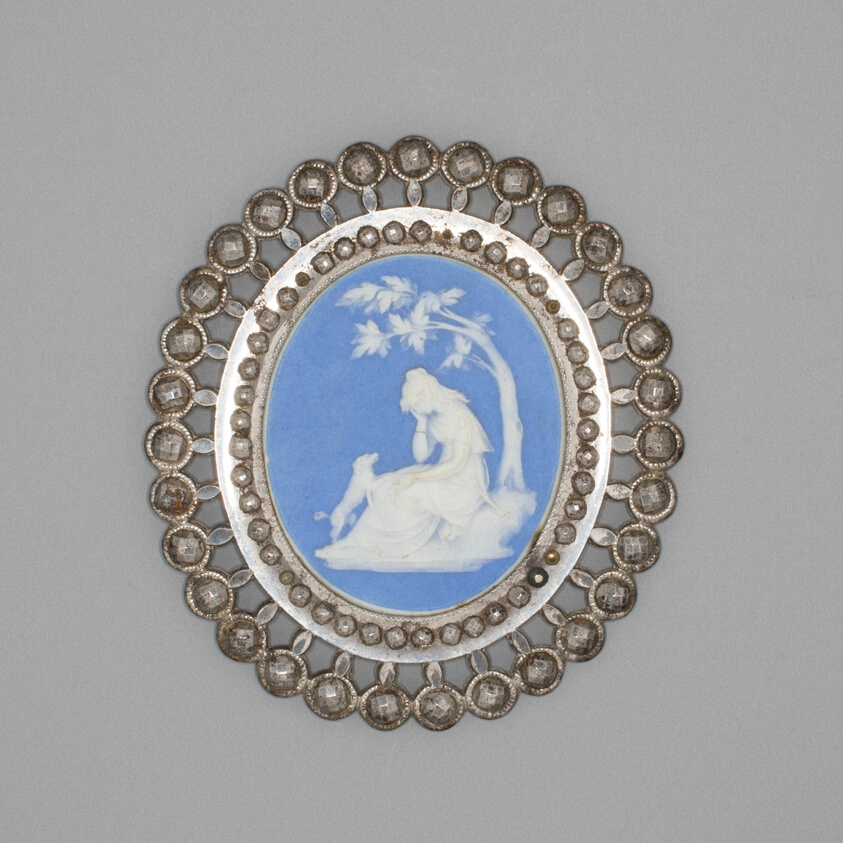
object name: Ceramics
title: Medallion with Woman and Dog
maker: Wedgwood Manufactory (England, founded 1759)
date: Late 18th century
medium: Stoneware (jasperware)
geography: Burslem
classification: sculpture; stoneware; european decorative arts; ceramics